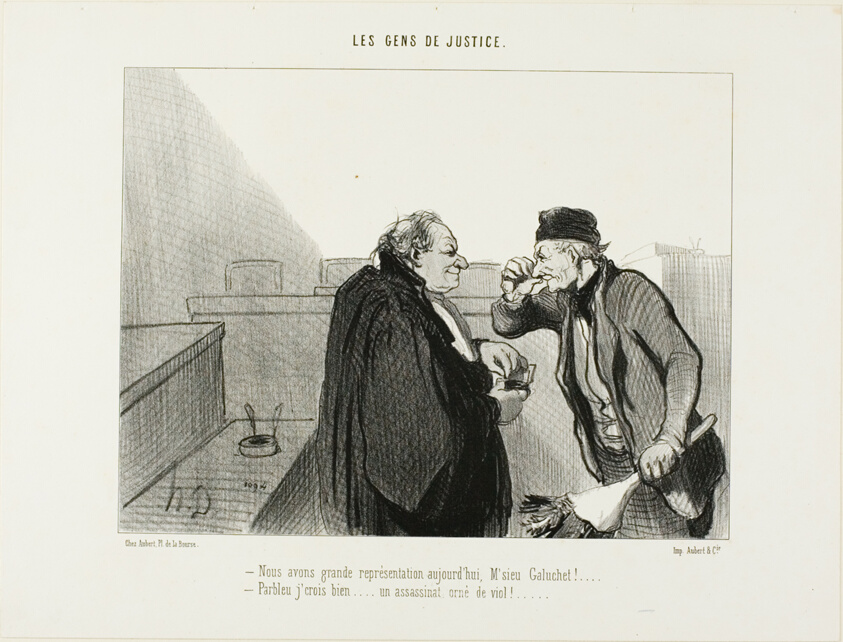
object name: Print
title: “- Should be a great performance today, Mr.Galuchet... - I should think so... A murder case with a rape thrown in...,” plate 31 from Les Gens De Justice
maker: Honoré Victorin Daumier; French, 1808-1879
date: 1847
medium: Lithograph in black on white wove paper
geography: France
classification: lithograph; print; prints and drawing